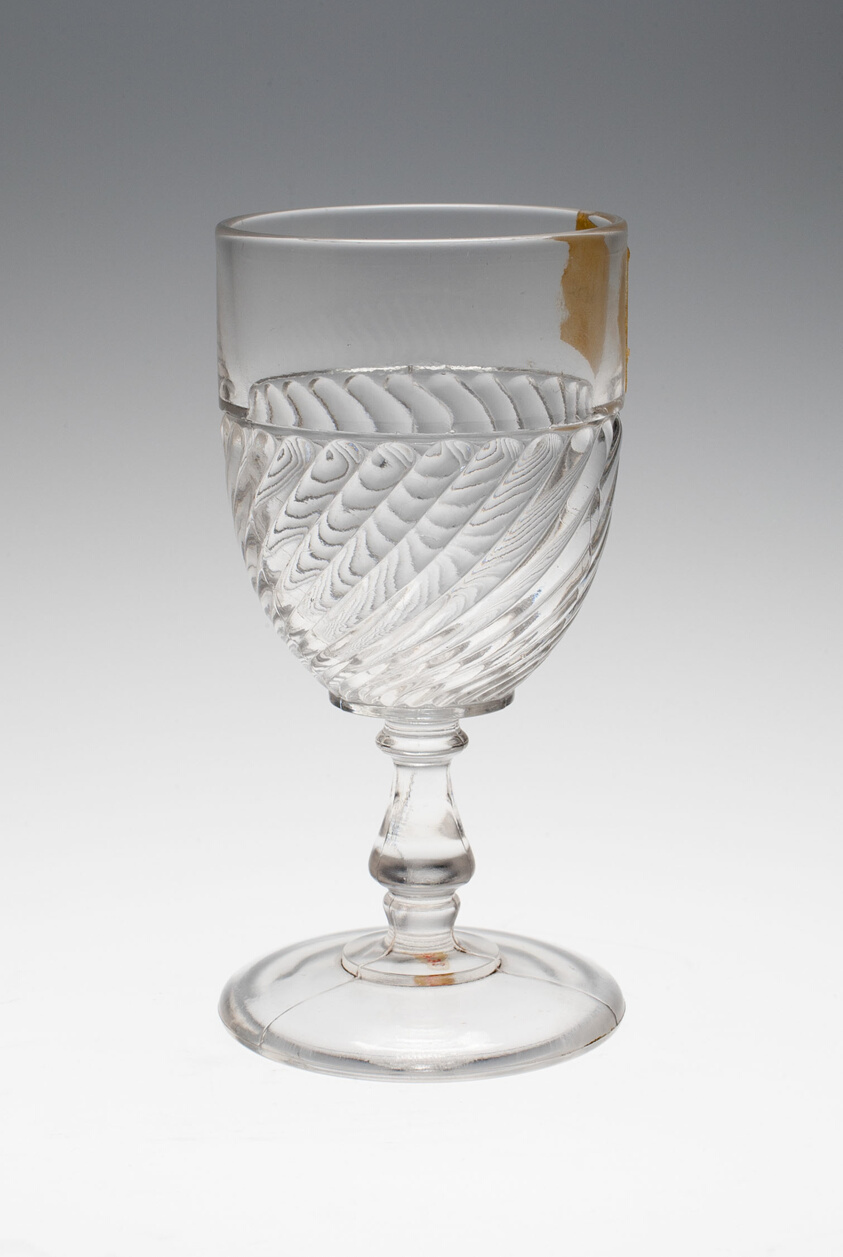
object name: Glass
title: Goblet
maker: England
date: c. 1800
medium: Glass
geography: England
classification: drinking vessel; glass; european decorative arts